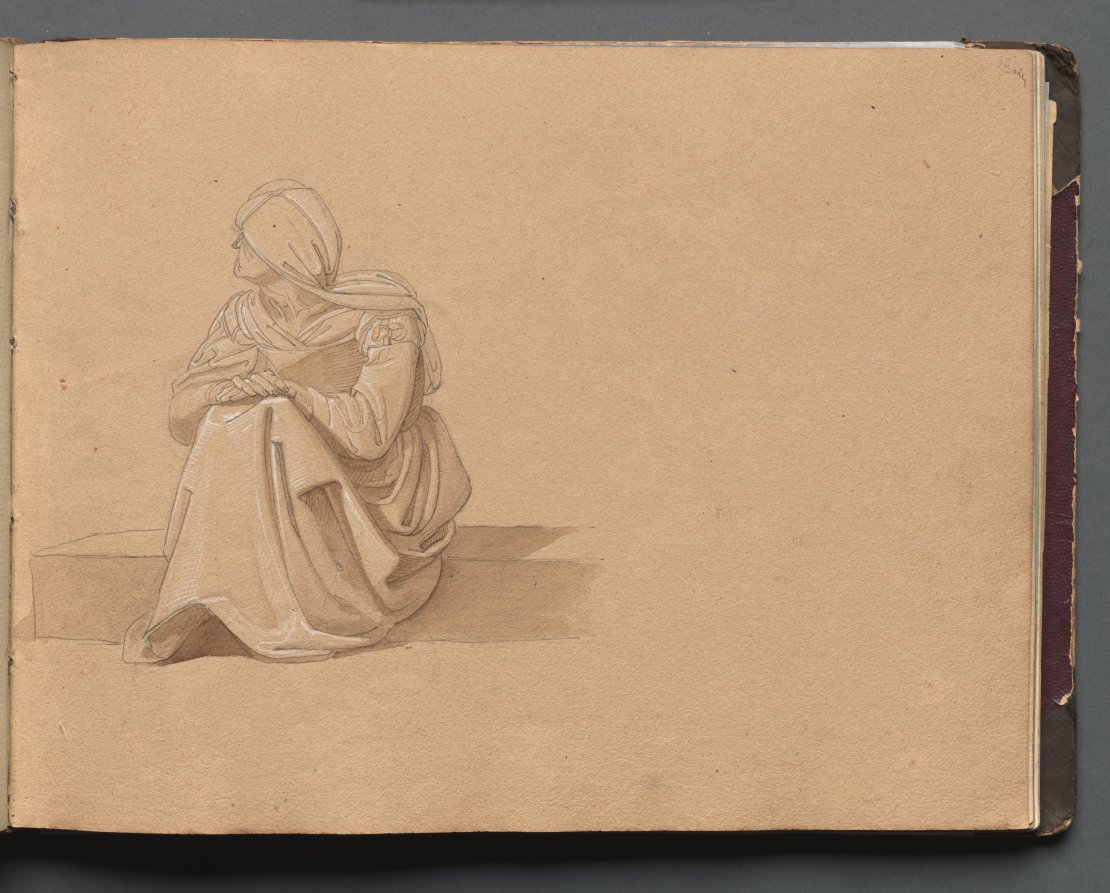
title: Album with Views of Rome and Surroundings, Landscape Studies, page 19a: Seated Female Figure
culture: Germany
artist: Franz Johann Heinrich Nadorp (German, 1794–1876)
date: c. 1830s-70s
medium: graphite and brown wash with white heightening on brown paper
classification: Bound Volume